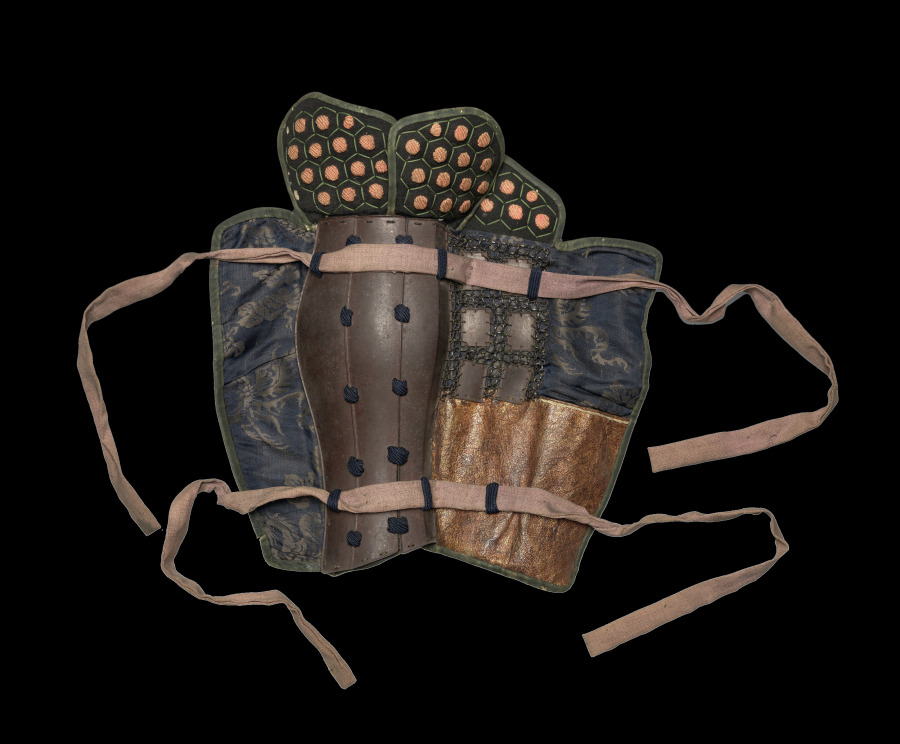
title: Shin Guard (Sune-ate)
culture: Japan, Edo period (1615–1868)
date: 1600s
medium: Iron, lacquer, textile (silk)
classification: Arms and Armor